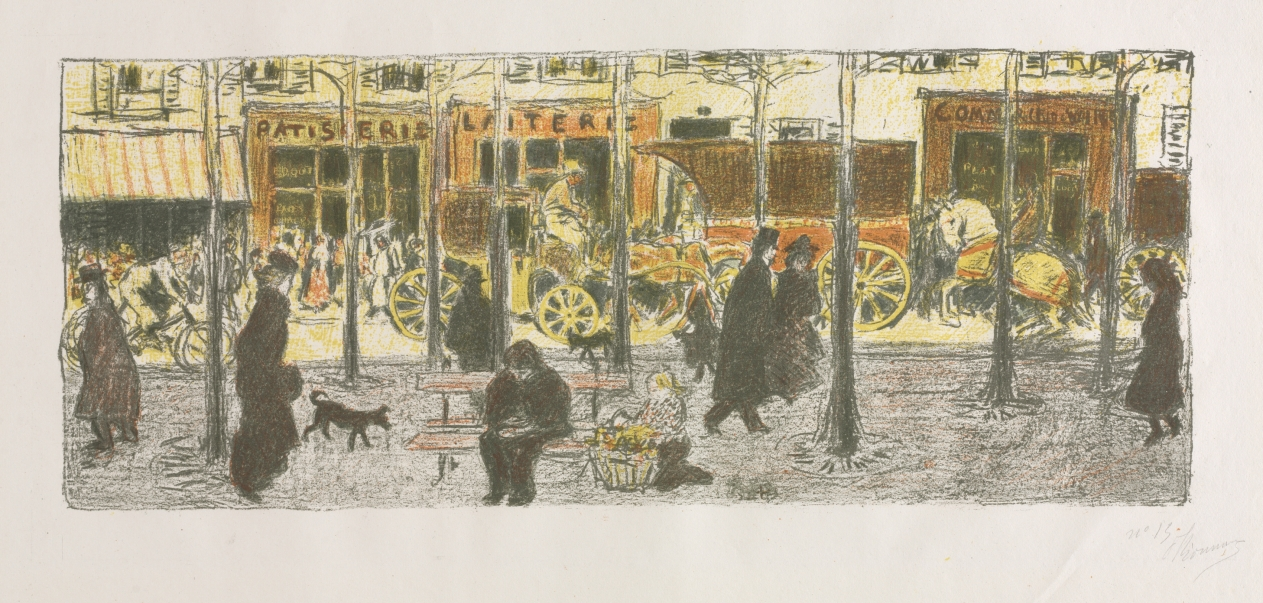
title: Boulevard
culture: France, 19th century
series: Some Scenes of Parisian Life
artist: Pierre Bonnard (French, 1867–1947)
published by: Published by Ambroise Vollard; Printed by Auguste Clot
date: 1899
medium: lithograph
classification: Print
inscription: signed, lower right, in graphite: P Bonnard numbered, lower right, in graphite: no 13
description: This suite of color lithographs collected Pierre Bonnard’s observations of city life, ranging from animated street scenes to distant observations glimpsed from the artist’s Montmartre studio window. Rather than memorializing the famous monuments of Paris, Bonnard preferred to depict small neighborhood scenes populated by urbanites shopping and strolling and by vendors selling their wares. The setting for one of the prints is the second-largest public park in Paris, the Bois de Boulogne, which was a popular place for families to relax, stroll, and enjoy carriage rides around the lakes. Two prints are nocturnal scenes in which gaslight emanating from shop windows is reflected on the wet streets, creating passages of bright yellow in the otherwise dark compositions. Bonnard’s favorite subjects, such as the Parisienne—a young, fashionable, modern woman—as well as children and dogs, appear repeatedly throughout the prints in the suite.